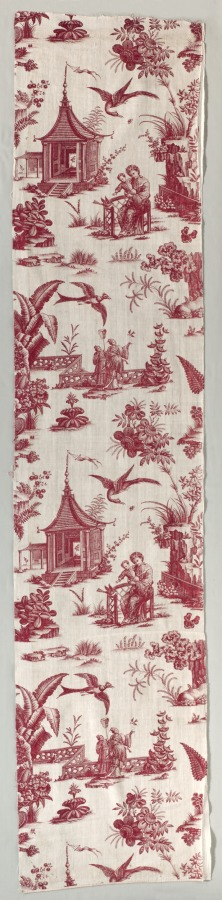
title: Copperplate-Printed Cotton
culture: England, Chambers, 18th century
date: 1700s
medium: copperplate printed cotton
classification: Textile